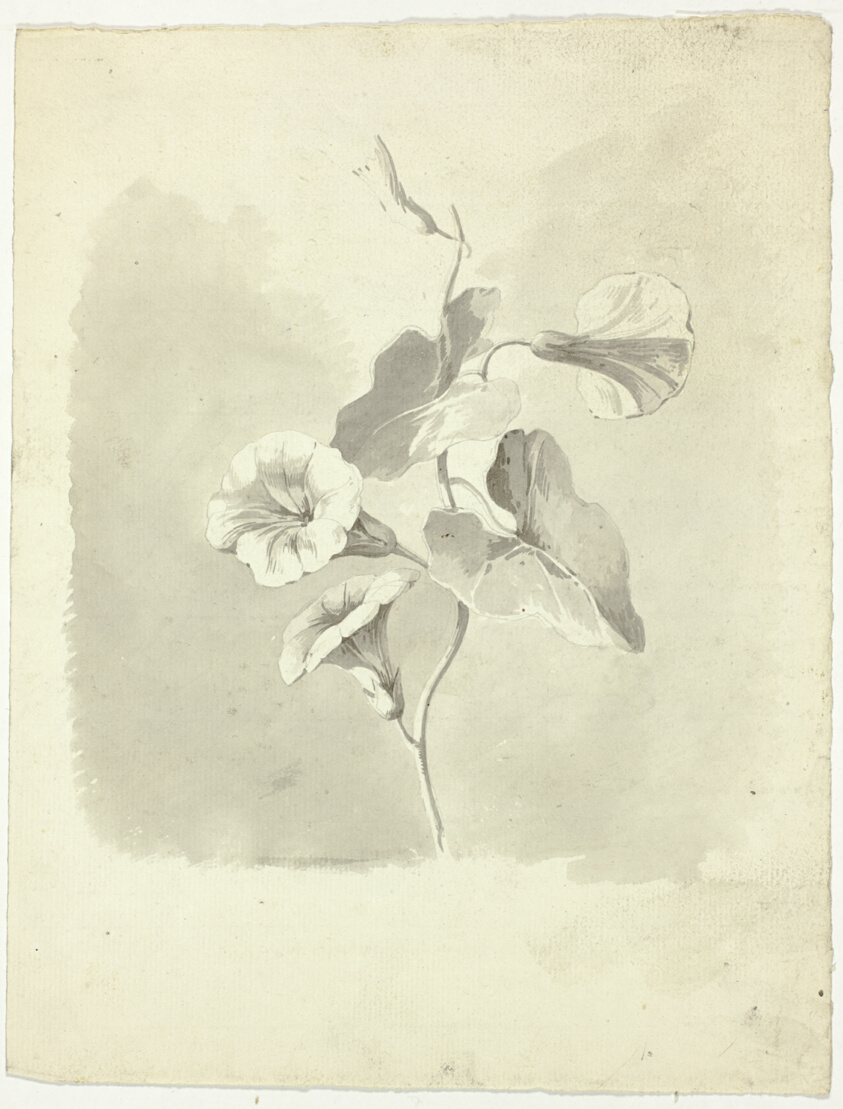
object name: Drawing and Watercolor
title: Morning Glories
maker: Pierre Antoine Mongin (French, 1761/62-1824/27)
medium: Brush and gray wash, over graphite, on cream laid paper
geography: France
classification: ink or chalk wash; drawings (visual works); prints and drawing